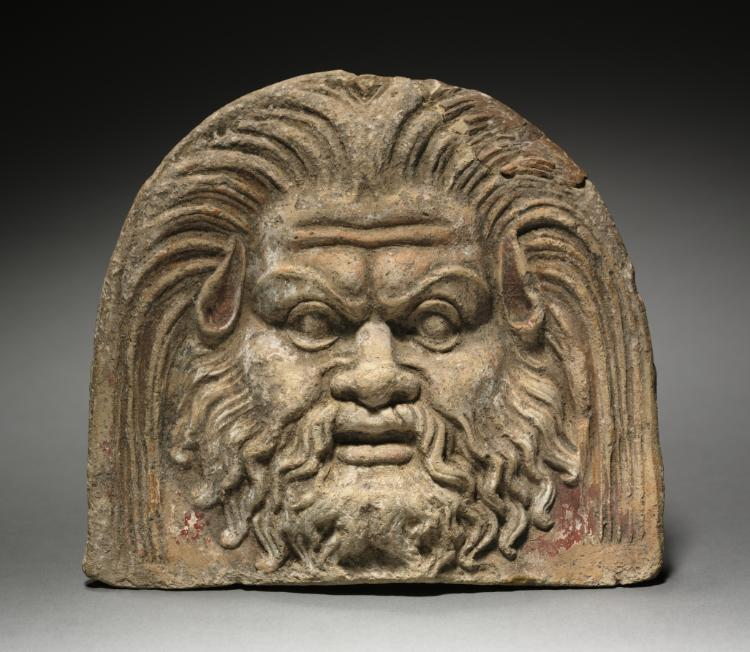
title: Antefix with Satyr Face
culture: Italy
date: 425–350 BCE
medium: terracotta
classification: Sculpture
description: This antefix would have been one of a series of identical tiles that decorated the edge of a roof. Ancient Greek antefixes were often stylized as mythological creatures such as gorgons or satyrs. This antefix represents the latter, showing the pointed ears and wild beard of a satyr, a nature spirit associated with ribaldry and festivals.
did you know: This antefix, a decorative roof tile, still retains some of its original pigment.